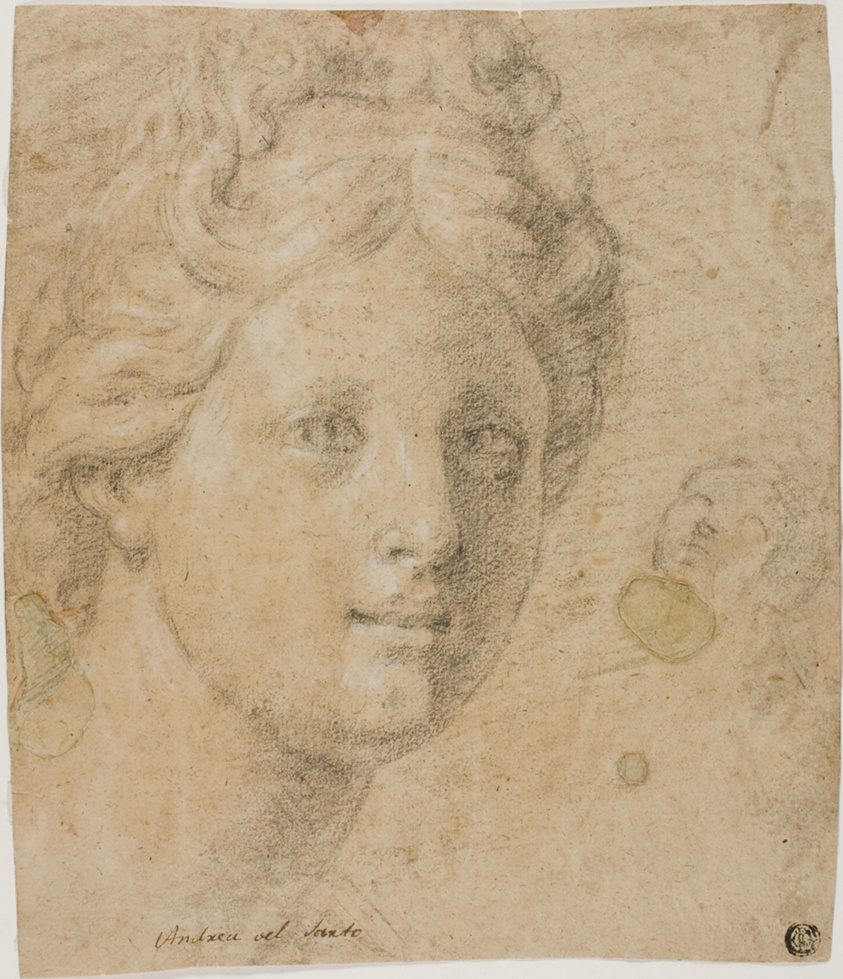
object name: Drawing and Watercolor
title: Head of a Woman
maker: Antonio Balestra (Italian, 1666-1740); or Andrea del Sarto (Italian, 1486-1530); or Cesare Dandini (Italian, c. 1595-1658)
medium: Black chalk heightened, with white chalk, on tan laid paper, partially laid down on gray laid paper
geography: Italy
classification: chalk; paper; drawings (visual works); prints and drawing